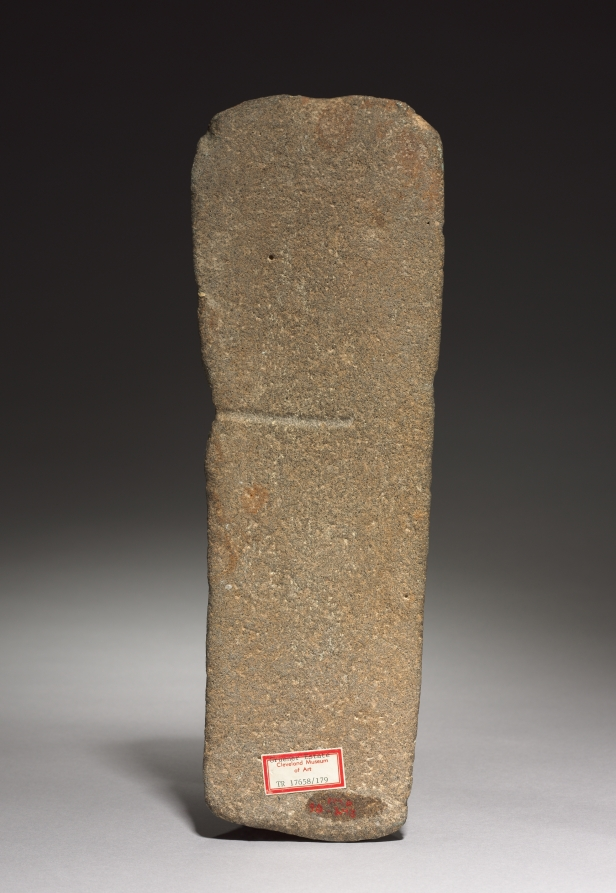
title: Animal Palma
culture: Mexico, Veracruz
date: 600–1000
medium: gray volcanic stone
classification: Sculpture